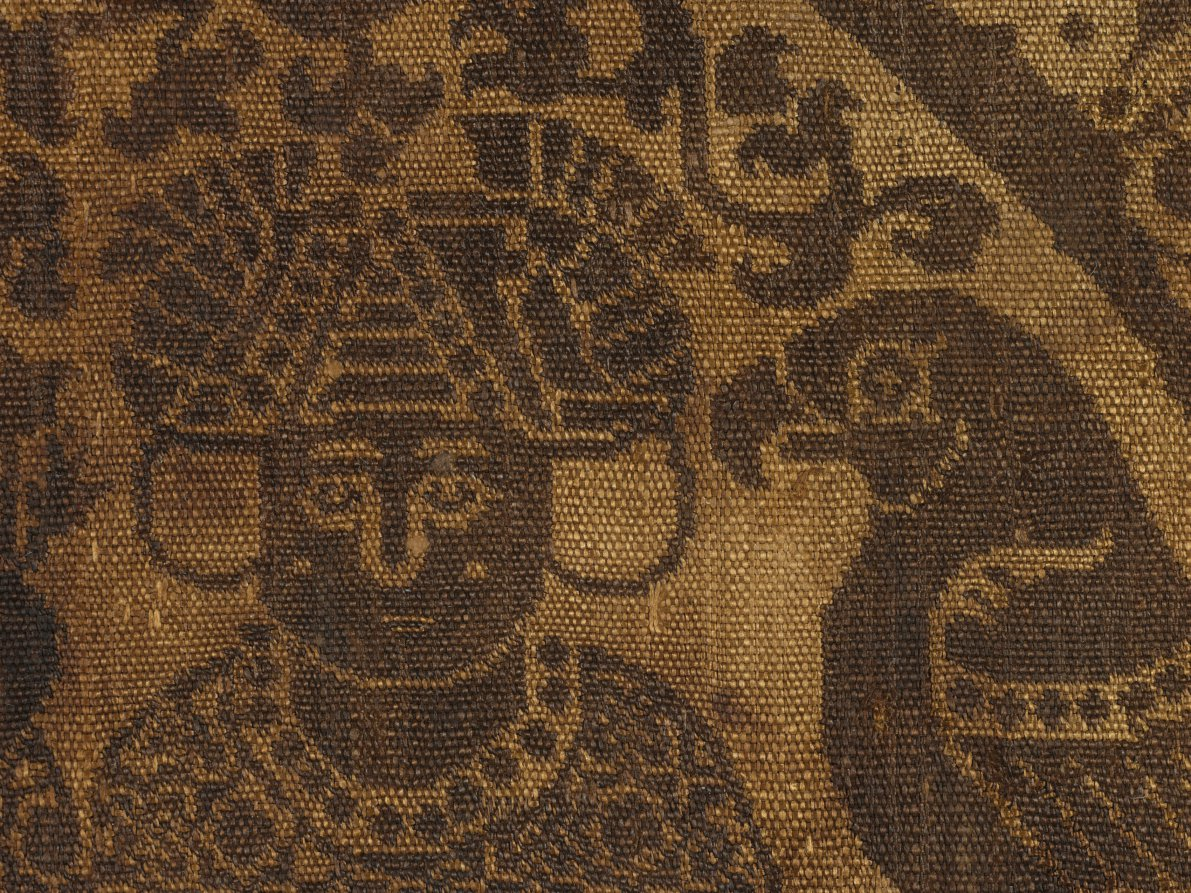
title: Fragment with falconer riding a bull in a rondel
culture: Iran, Rayy, Seljuk period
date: 1000s–1100s (radiocarbon date, 95% probability)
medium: Silk: double cloth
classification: Textile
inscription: inner band of a foliate Kufic inscription: ". . . . . . wa-bastah wa-'ala['] lil-shay[kh?] al-sayyid al-mansur al-mu['a] yyad Abi Nasr . . . bin[?] . . ."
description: The princely sport of falconry was frequently represented in medieval luxury silks. Here, the falconer wears a jeweled turban, the most significant item of men’s dress, and rides sidesaddle on a bull. His tunic displays two small designs: overlapping octagons and the conventional star and cross motif. On his gloved hand, he probably supports a coveted gyrfalcon, a large, superior bird. The border displays an inner inscription and an outer animal procession, an ancient Near Eastern theme, of real and mythical creatures. This double cloth has two distinct layers that exchange position according to the pattern. The crisply broken edges and scattered brittle threads are typical of the fragility of authentic medieval Iranian silks.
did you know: The falconer's round face with delicate features represents the ideal Iranian beauty, complemented by the chic round hairballs beside his cheeks.